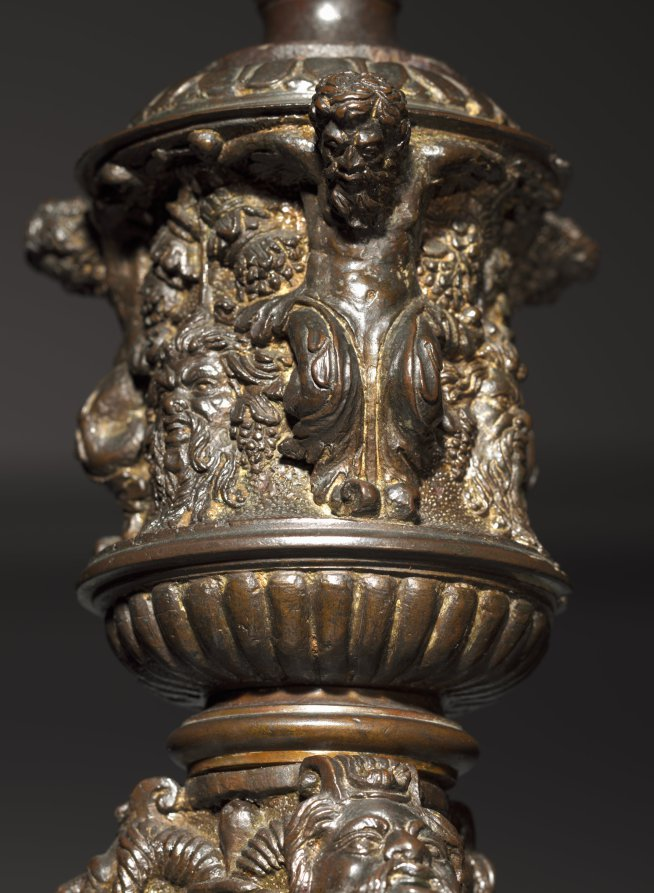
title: Paschal Candlestick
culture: Northern Italy, possibly Padua, 16th century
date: c. 1525–1550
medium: bronze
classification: Sculpture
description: In Roman Catholic practice, a large candlestick holds the Paschal Candle, blessed and lit for the first time on Easter eve, then used on significant occasions throughout the year. Despite its religious function, the decorations here are entirely secular-ranging from panthers and bound satyrs to the heads of raptors and goats. These elements derive from ancient Roman sculpture and were especially popular among intellectuals in northern Italy, who were actively exploring connections among pagan traditions, ancient philosophy, and Christianity.